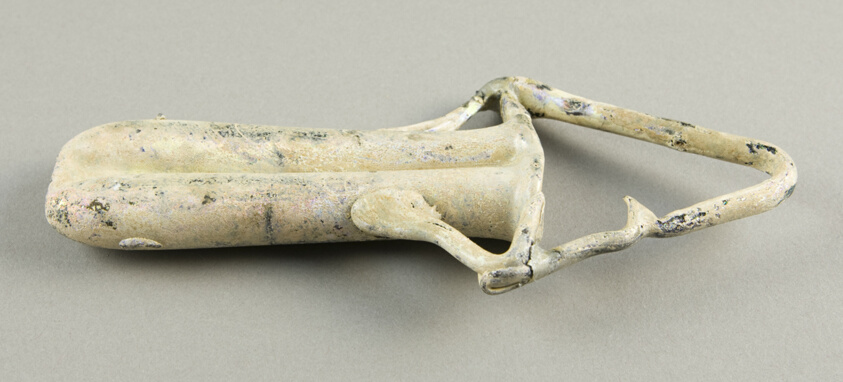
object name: Vessel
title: Cosmetic Container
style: ancient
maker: Ancient Mediterranean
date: 4th century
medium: Glass, blown technique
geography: Mediterranean Region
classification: glass; vessel; ancient art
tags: beauty